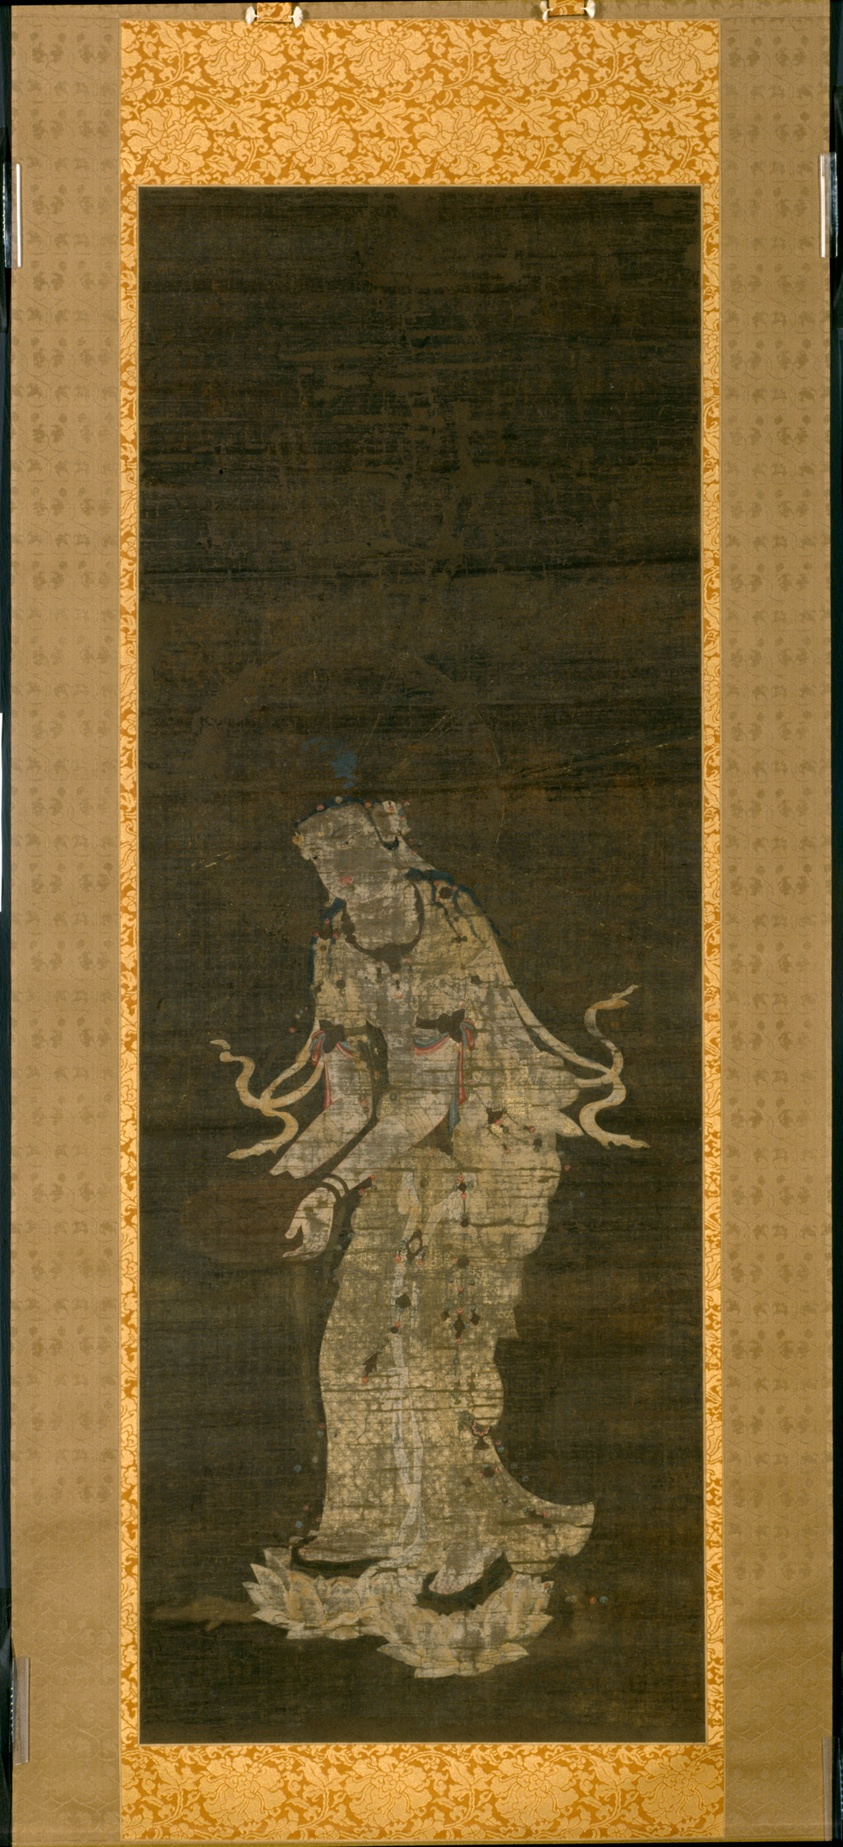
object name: Painting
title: The Bodhisattva Kannon, from the triptych Approach of the Amida Trinity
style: Japanese (culture or style)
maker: Artist unknown; Japanese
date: Kamakura Period; mid–13th century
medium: Hanging scroll; ink, colors, and cut gold on silk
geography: Japan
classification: hanging scroll; painting; asian art